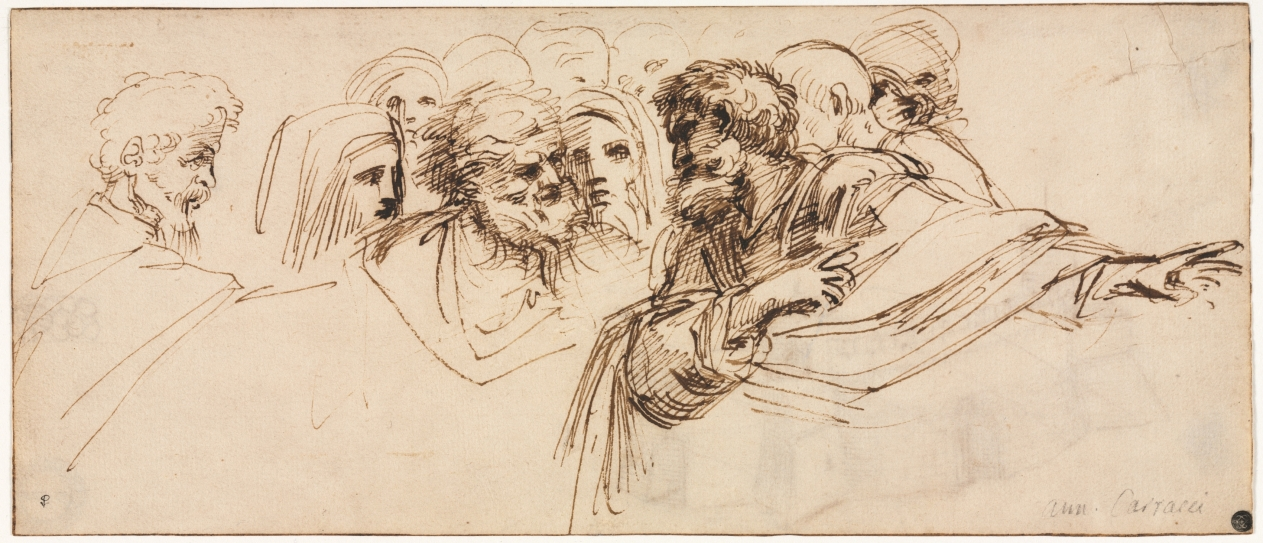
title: Study of Heads (recto)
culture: Italy, second half 16th century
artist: Agostino Carracci (Italian, 1557–1602)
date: 2nd half 1500s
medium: pen and brown ink; framing lines in brown ink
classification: Drawing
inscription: lower right, in black chalk: Ann . Carracci